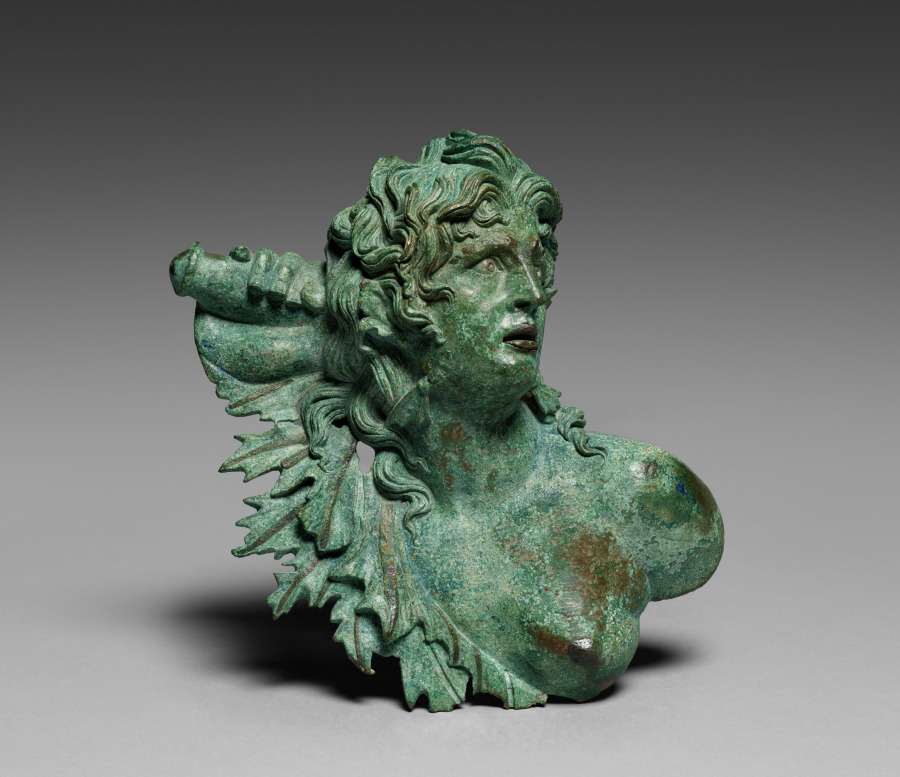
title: Tritoness or Scylla Relief Applique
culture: Greece, Hellenistic period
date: late 200s BCE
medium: bronze with copper inlays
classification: Metalwork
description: The seaweed garment, finned gills, and webbed ears give this female bust appliqué all the hallmarks of an ocean dweller. She may be a Tritoness, a minor goddess of the sea and the female counterpart to the more common Triton. However, her intense gaze and raised arm clutching perhaps the hilt of a sword suggest she may be Scylla, a sea monster that first appears in Homer’s Odyssey. Without the Tritoness’s fishtail or Scylla’s lower body made of dogs’ heads, it is difficult to differentiate. Certain features are highlighted with a copper inlay such as the lips, eyes, and gills.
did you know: Mythological sea creatures became popular metal vessel decorations around the 2nd-century BCE.